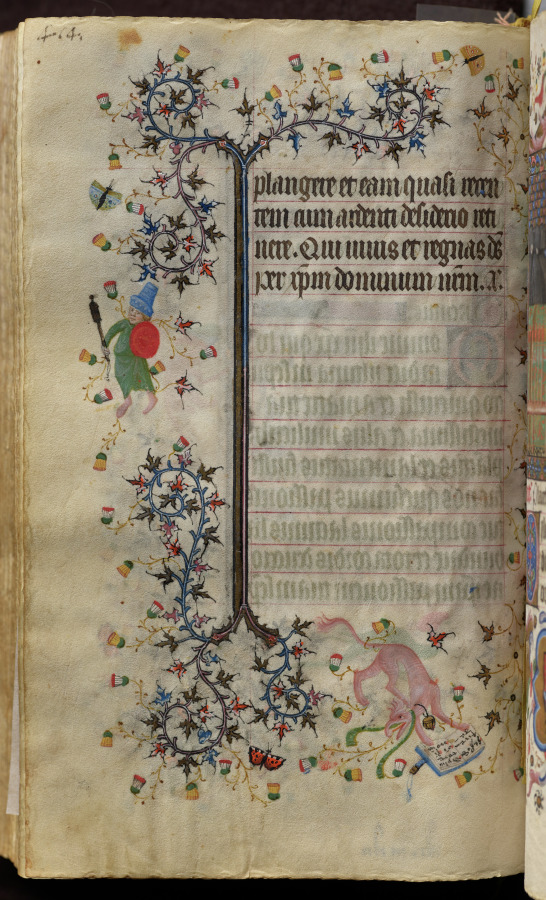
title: Hours of Charles the Noble, King of Navarre (1361-1425): fol. 201v, Signature of Zecho da Firenze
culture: France, Paris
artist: Master of the Brussels Initials and Associates (French)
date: c. 1405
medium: ink, tempera, and gold on vellum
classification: Bound Volume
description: This precious volume was obviously highly prized by its owner, the French-born King of Navarre, who had his coat of arms painted on no less than twenty folios. Rather than directly commissioning this manuscript from a specific workshop, it seems that Charles the Noble acquired his book of hours -- perhaps ready-made for the luxury market -- while on a trip to Paris in 1404-05. A collaborative effort, six painting styles are evidenced within the pages of this codex, those of two Italians, two Frenchmen, and two Netherlanders. The painter who was responsible for the planning and decoration of the book, and who produced seventeen of the large miniatures, was a Bolognese artist known as the Master of the Brussels Initials. His principal assistant, responsible for most of the borders, was a Florentine who signed his name "Zecho" da Firenze on folio 208 verso.